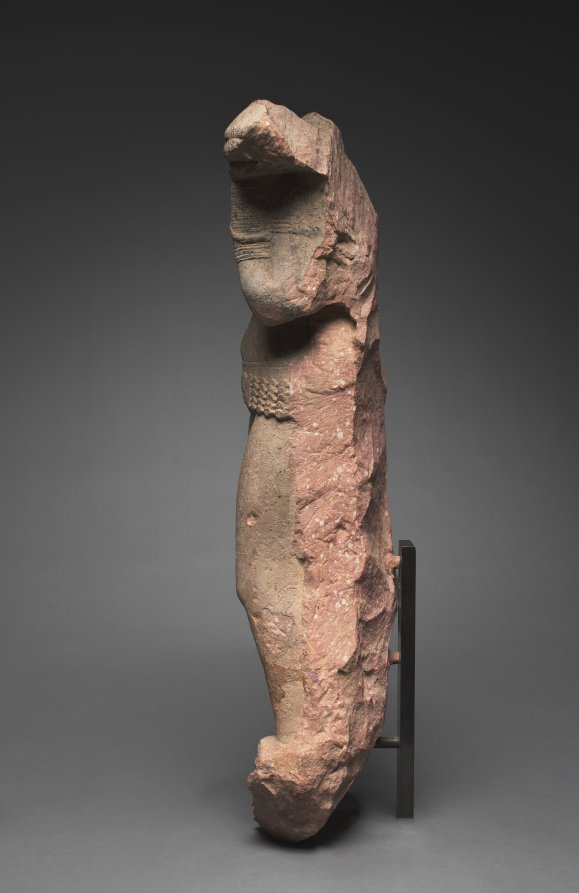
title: Female Devotee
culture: India, Mathura, Kushan period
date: c. early 100s CE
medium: sandstone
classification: Stone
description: This female devotee is depicted approaching the place of worship carrying a covered wicker tray that would have been filled with fresh flower garlands.The sense of dynamism and power in the stance, the masterful transformation of stone into the suppleness of youthful, voluptuous flesh barely interrupted by clothing, as well as touches of naturalism—seen in the slipping of the large bangle down the spiral cuff—are all stylistic characteristics of female figures made during the early 2nd century.